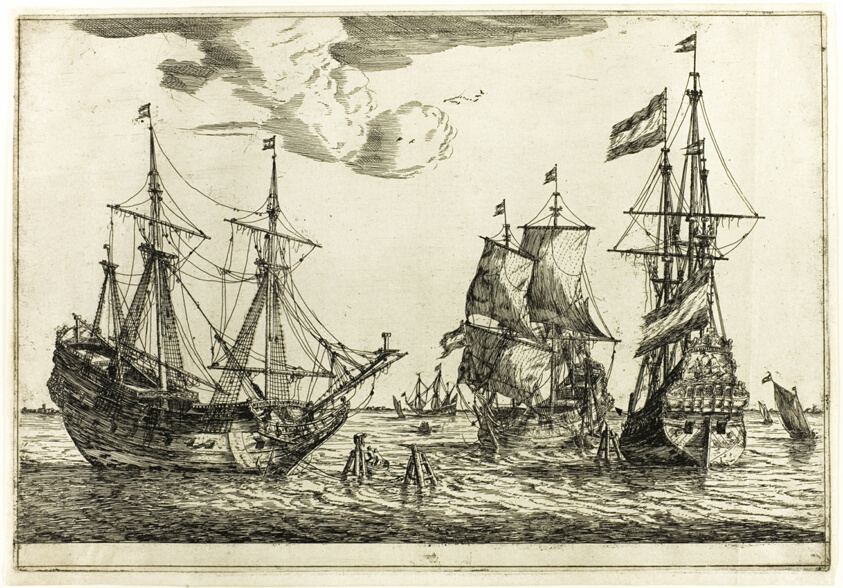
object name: Print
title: Three Moored Sailing Vessels, from Thirteen Naval Scenes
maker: Reinier Nooms, called Zeeman (Dutch, c.1623-1664)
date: 1650/64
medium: Etching on ivory laid paper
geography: Holland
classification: etching; print; prints and drawing